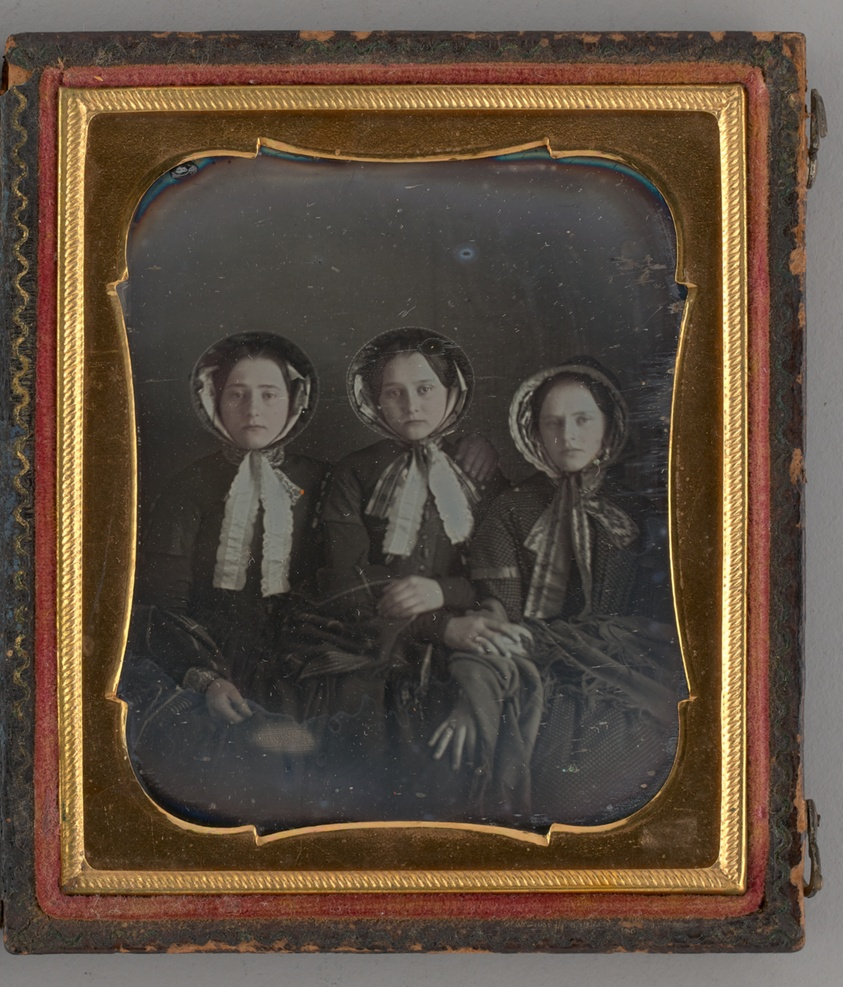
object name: Photograph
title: Untitled (Portrait of Three Girls)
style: 19th century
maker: Unknown maker; American, 19th century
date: 1850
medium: Daguerreotype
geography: United States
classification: portrait; photograph; photographic process; photography; portrait; daguerreotype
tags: lundberg collection, portraits: female subject, portrait, girls, females, portraits, portraits: child subject